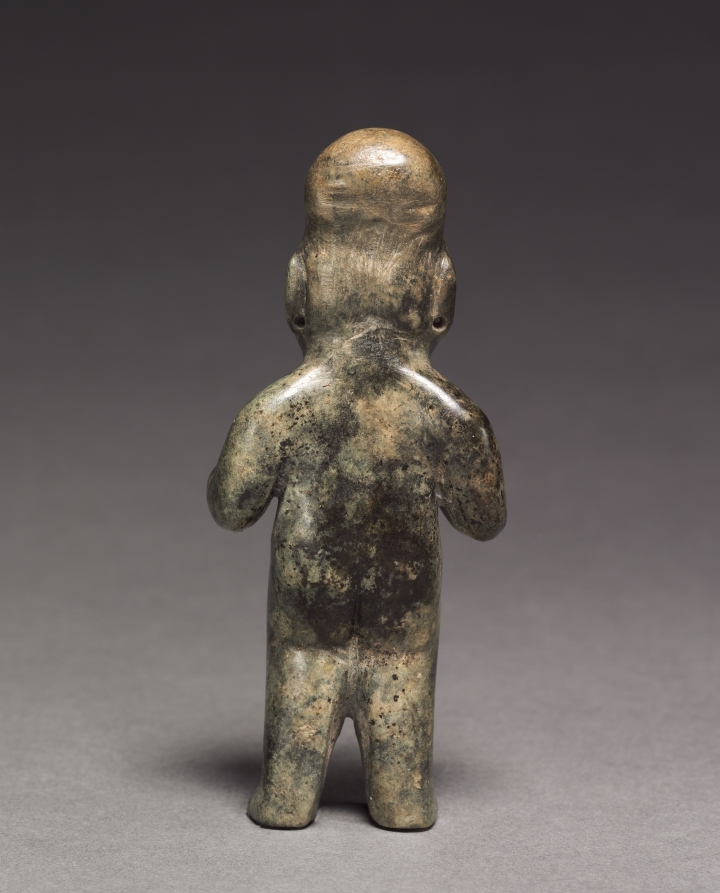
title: Standing Figure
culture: Mesoamerica, Mexico, Olmec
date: c. 900–400 BCE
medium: serpentine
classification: Sculpture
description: The Olmec were Mesoamerica's greatest lapidaries; their work in jade and serpentine was prized by both contemporary and later Mesoamerican cultures. Human beings were jaguar traits (such as the downturned mouth and paw-like hands of this figurine) are common in Olmec art. Such creatures were probably believed to possess supernatural powers.